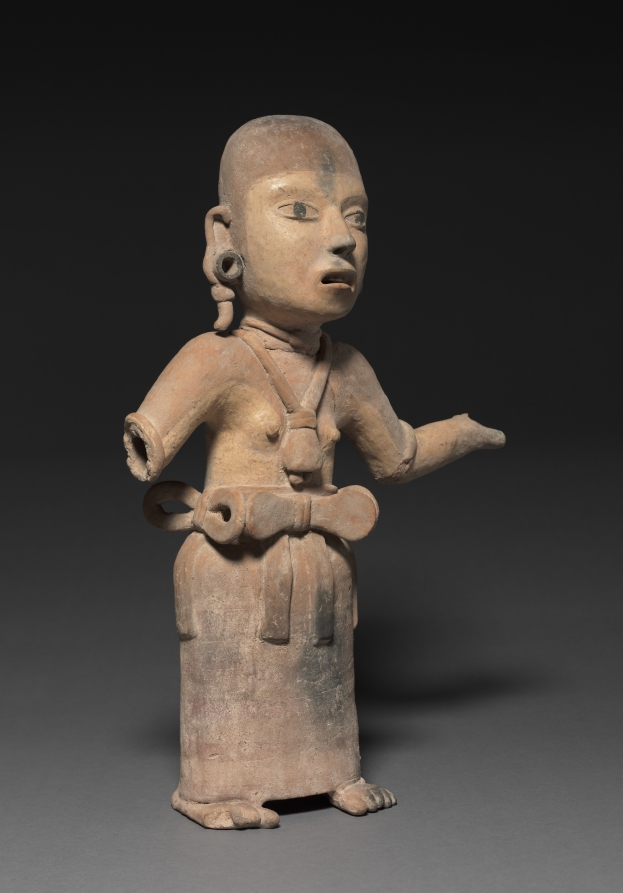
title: Female Figure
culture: Mexico, Southern Veracruz, Limon, Remojades Monumental Sculpture type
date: 200–500 CE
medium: pottery with burnished buff slip and asphalt paint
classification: Sculpture